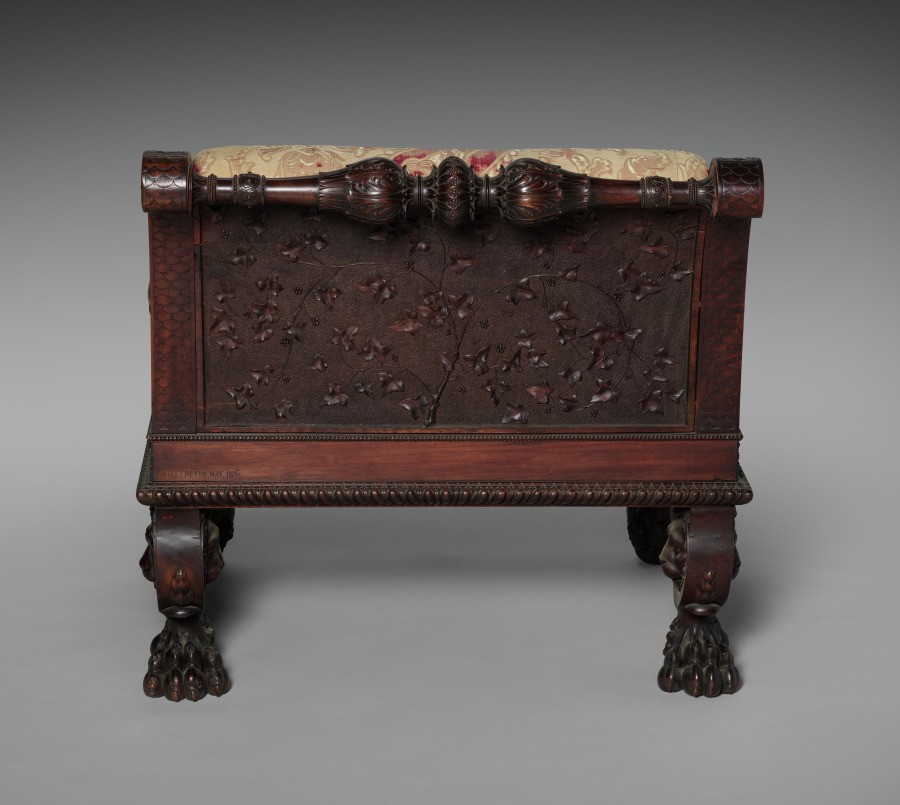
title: Armchair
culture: Italy, Florence, 19th century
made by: Luigi Frullini (Italian, 1839–1897)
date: 1876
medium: walnut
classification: Furniture and woodwork